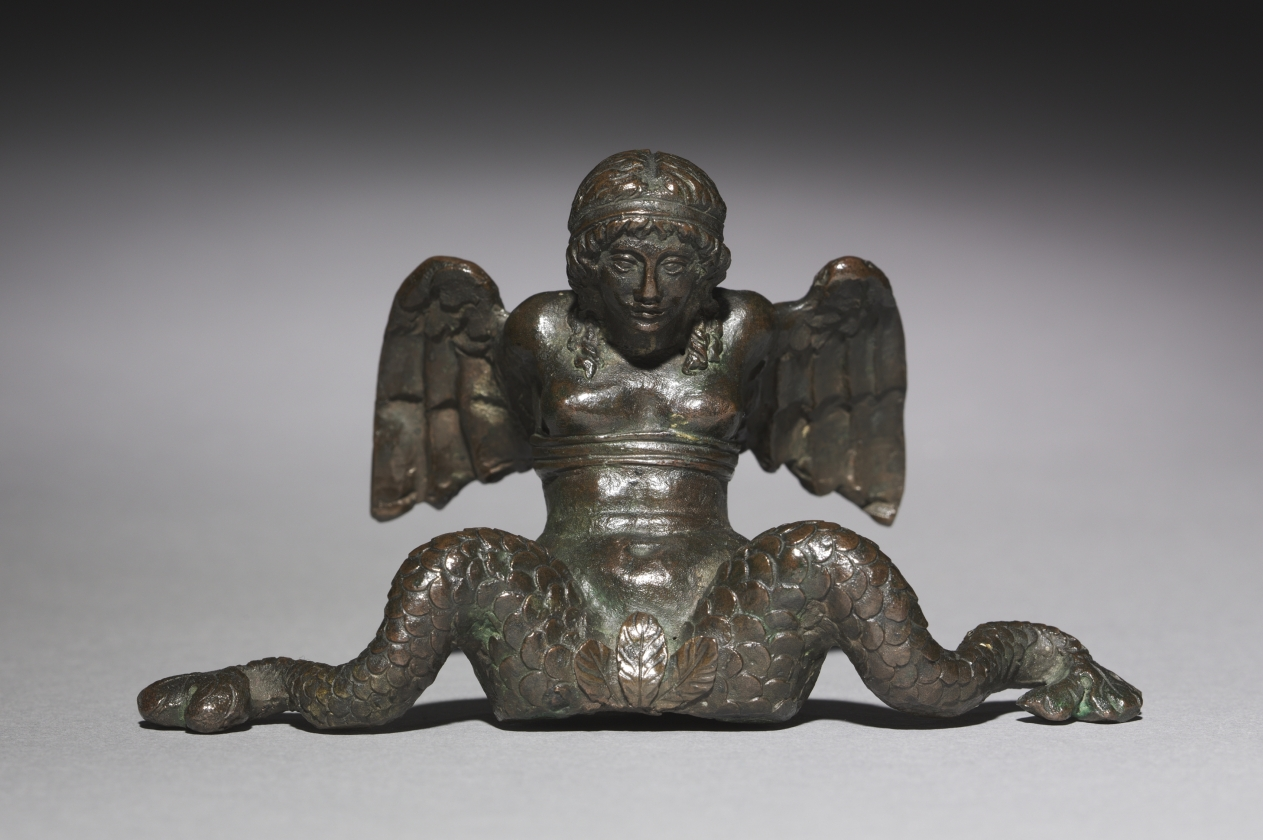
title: Doorpull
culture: Italy, 16th century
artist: Leone Leoni (Italian, 1509–1590)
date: 16th century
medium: bronze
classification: Sculpture